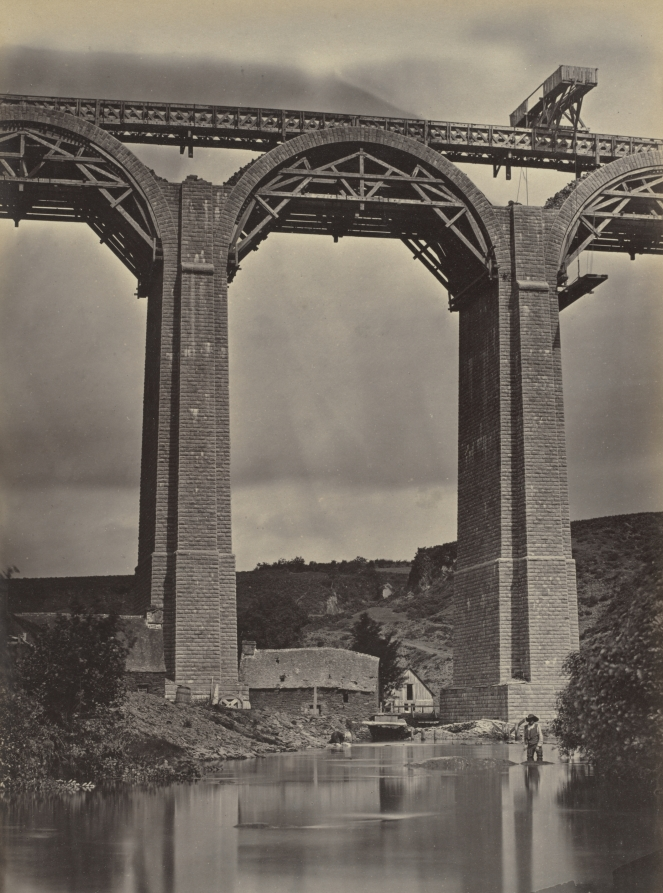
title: Pont-de-Buis, on the Doufine, France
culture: France, 19th century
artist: Jules DuClos (French, 1824–1879)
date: c. 1865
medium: albumen print from wet collodion negative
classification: Photograph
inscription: Written in ink on recto: "28"; "Ligne de Châteaulin à Landerneau."; "Viaduc de Pont-de-Buis, sur la Doufine."; "Construction des voûtes"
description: The extension of railroad service from Paris across Brittany in northern France occurred in stages between 1840 and 1865. It required the construction of railway bridges such as this masonry viaduct which crosses the Doufine River near Pont-de-Buis. Jules DuClos shows it under construction, with timbers supporting the arches and a man standing in the river below.